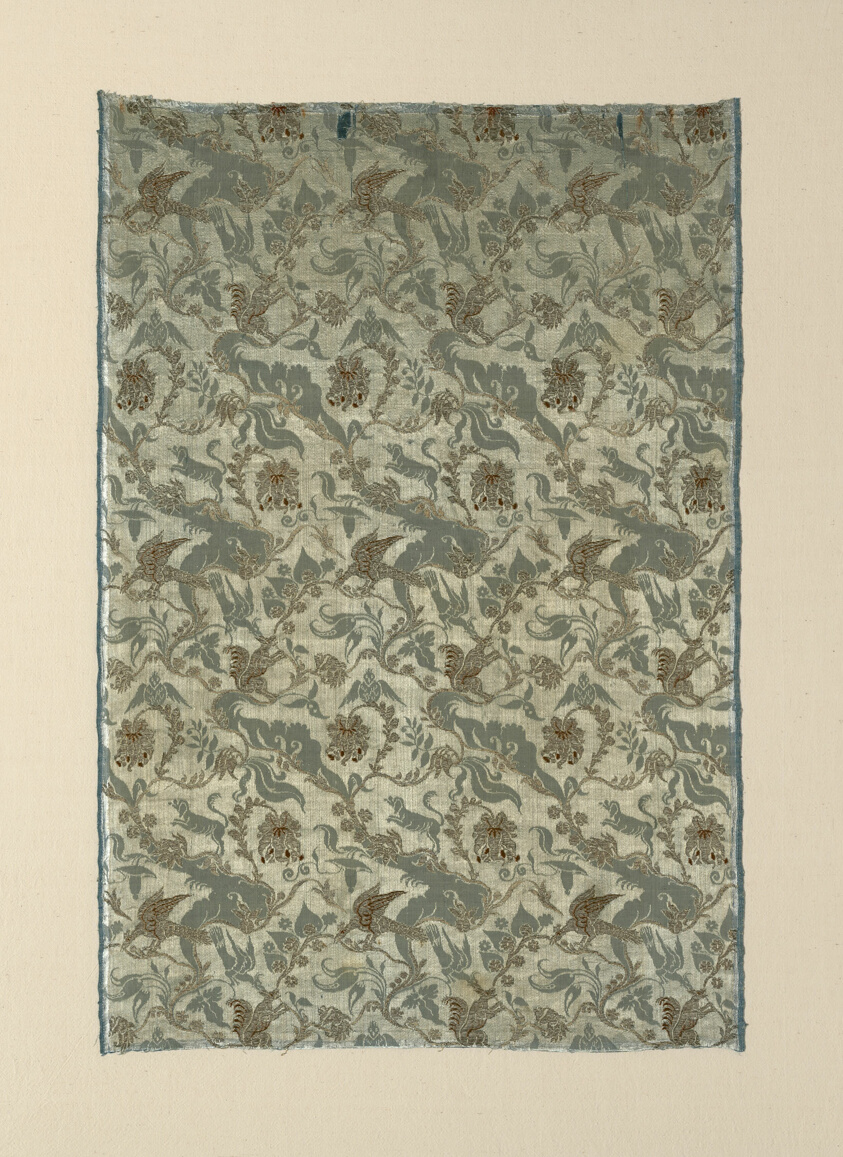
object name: Textile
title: Panel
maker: Probably Italy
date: 18th century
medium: Silk and gilt-metal-strip-wrapped silk, warp-float faced 7:1 satin weave with supplementary brocading wefts and self-patterned by areas of plain weave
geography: Italy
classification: textile; weaving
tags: circles, flowers